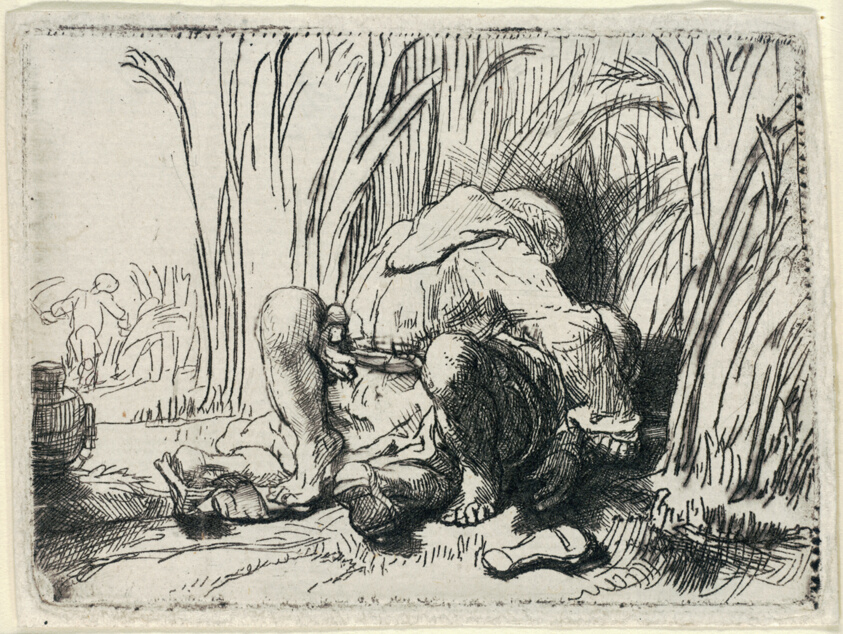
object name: Print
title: The Monk in the Cornfield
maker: Rembrandt van Rijn (Dutch, 1606-1669)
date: c. 1646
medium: Etching with drypoint on ivory laid paper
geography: Netherlands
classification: etching; print; prints and drawing; paper